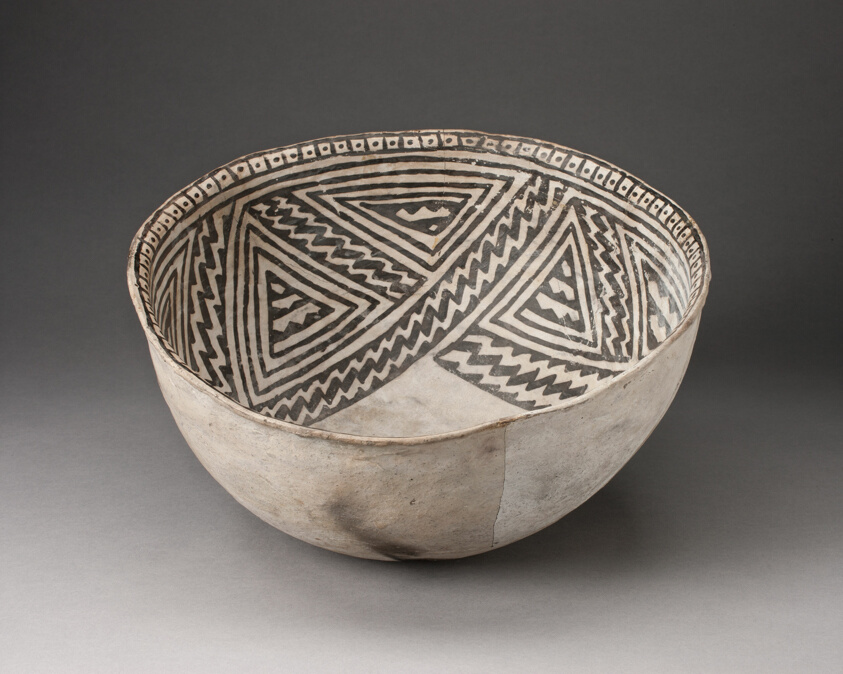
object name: Vessel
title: Bowl with Interlocking Zigzag Motif in Four-Part Design on Interior Walls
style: ancestral pueblo (anasazi), anasazi, Pre-Columbian, americas, southwest, pueblo, Arts of the Americas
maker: Ancestral Pueblo (Anasazi), Kayenta Black-on-white; Kayenta area, north-east Arizona, United States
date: 950–1400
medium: Ceramic and pigment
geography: Arizona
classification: bowl; earthenware; ceramics; vessel; art of the americas